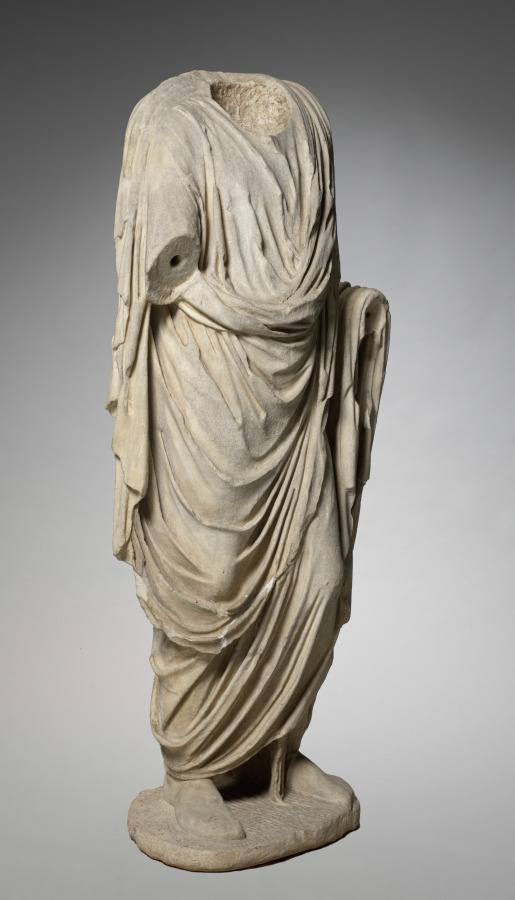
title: Togatus Figure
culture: Italy, Roman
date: 1–200 CE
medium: pentelic marble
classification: Sculpture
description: From 1929 until 1973, this toga-clad body was displayed with a portrait head of Vespasian (recarved from Nero) that did not originally belong to it. Several details indicate a mismatch: the surfaces and proportions differ, and the head projected awkwardly forward even after modern recarving of the neck to fit into the body cavity. Aspects of the toga also suggest that it was sculpted later than the head.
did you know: This body once included a separately made head and arms.